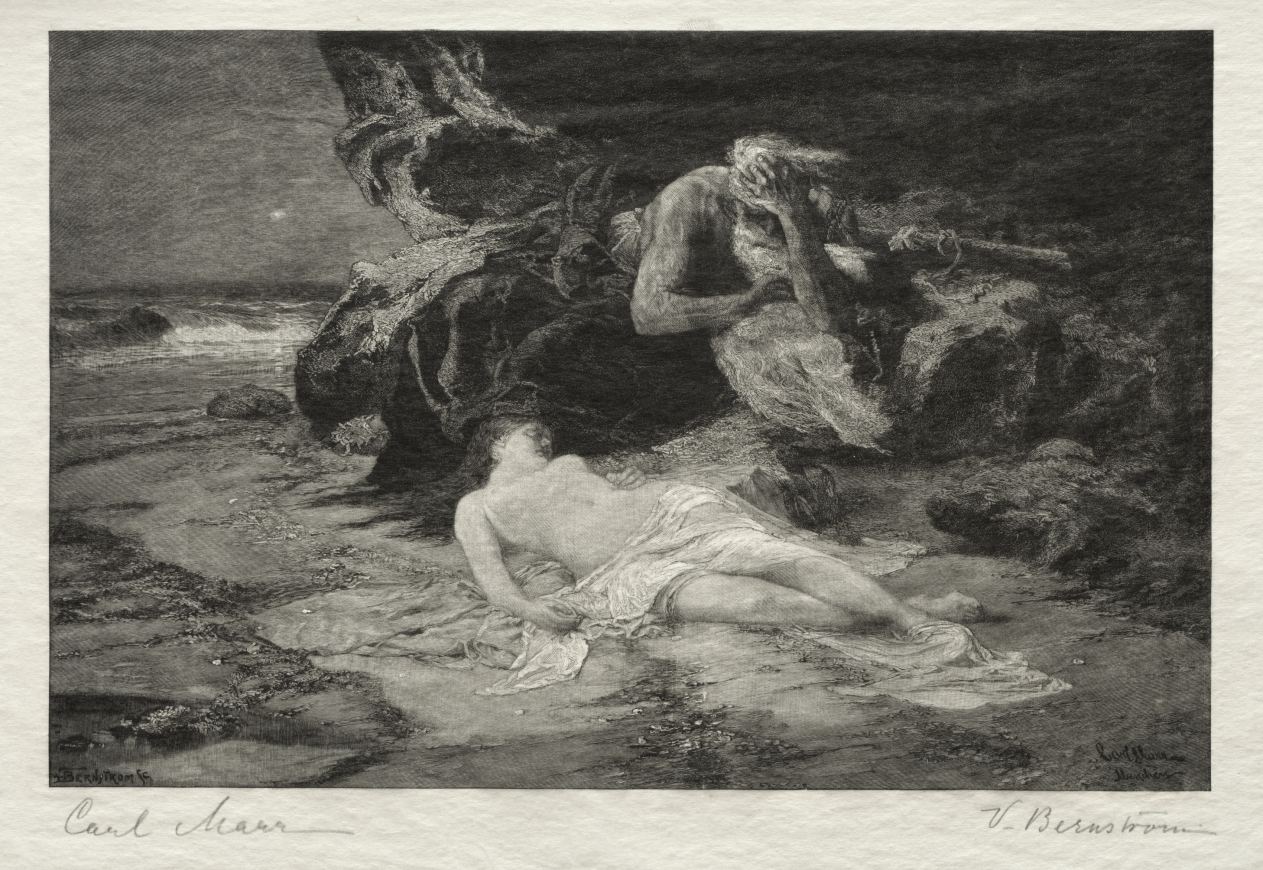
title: The Mystery of Life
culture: America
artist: Victor Bernstrom (American, 1845–1907)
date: 1887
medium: wood engraving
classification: Print